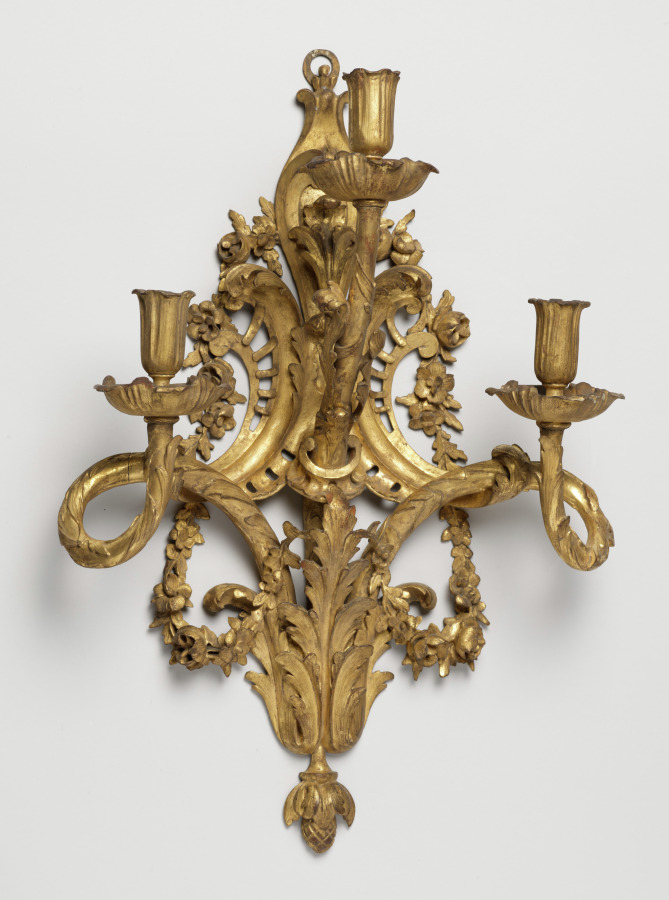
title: Candle Bracket (2 of 2)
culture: France, Transitional Style, Louis XV to Louis XVI, 18th century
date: c. 1765–1775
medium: gilded wood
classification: Furniture and woodwork